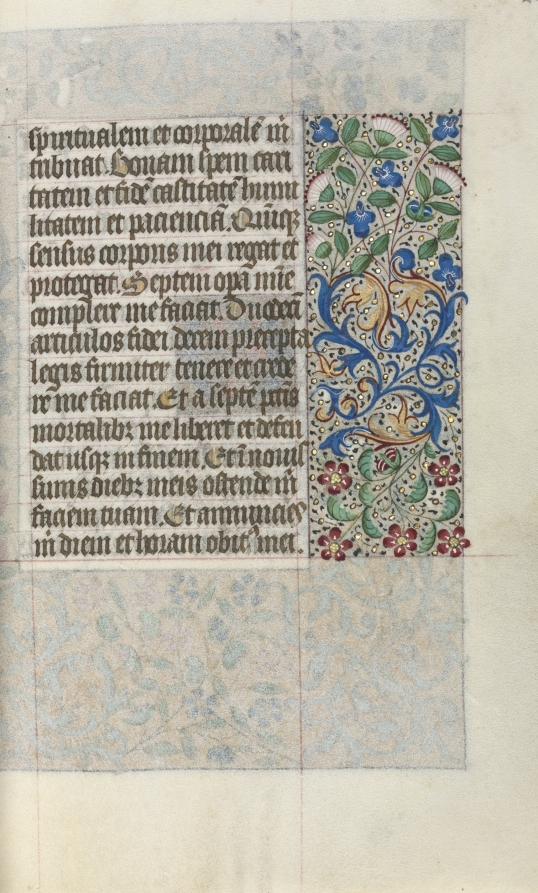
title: Book of Hours (Use of Rouen): fol. 22r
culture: France, Rouen, 15th century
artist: Master of the Geneva Latini (French, active Rouen, 1460–80)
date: c. 1470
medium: ink, tempera, and gold on vellum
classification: Bound Volume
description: In the late 1400s and early 1500s Rouen was an established and important center of book production. The city’s cathedral had a wealthy chapter that spent large sums of money to commission books and to maintain its extensive library. The stationers and booksellers would have likely been concentrated in or near the cathedral precinct. This artist, named after a manuscript now in Geneva, was Rouen’s principal illuminator during the second half of the 1400s.